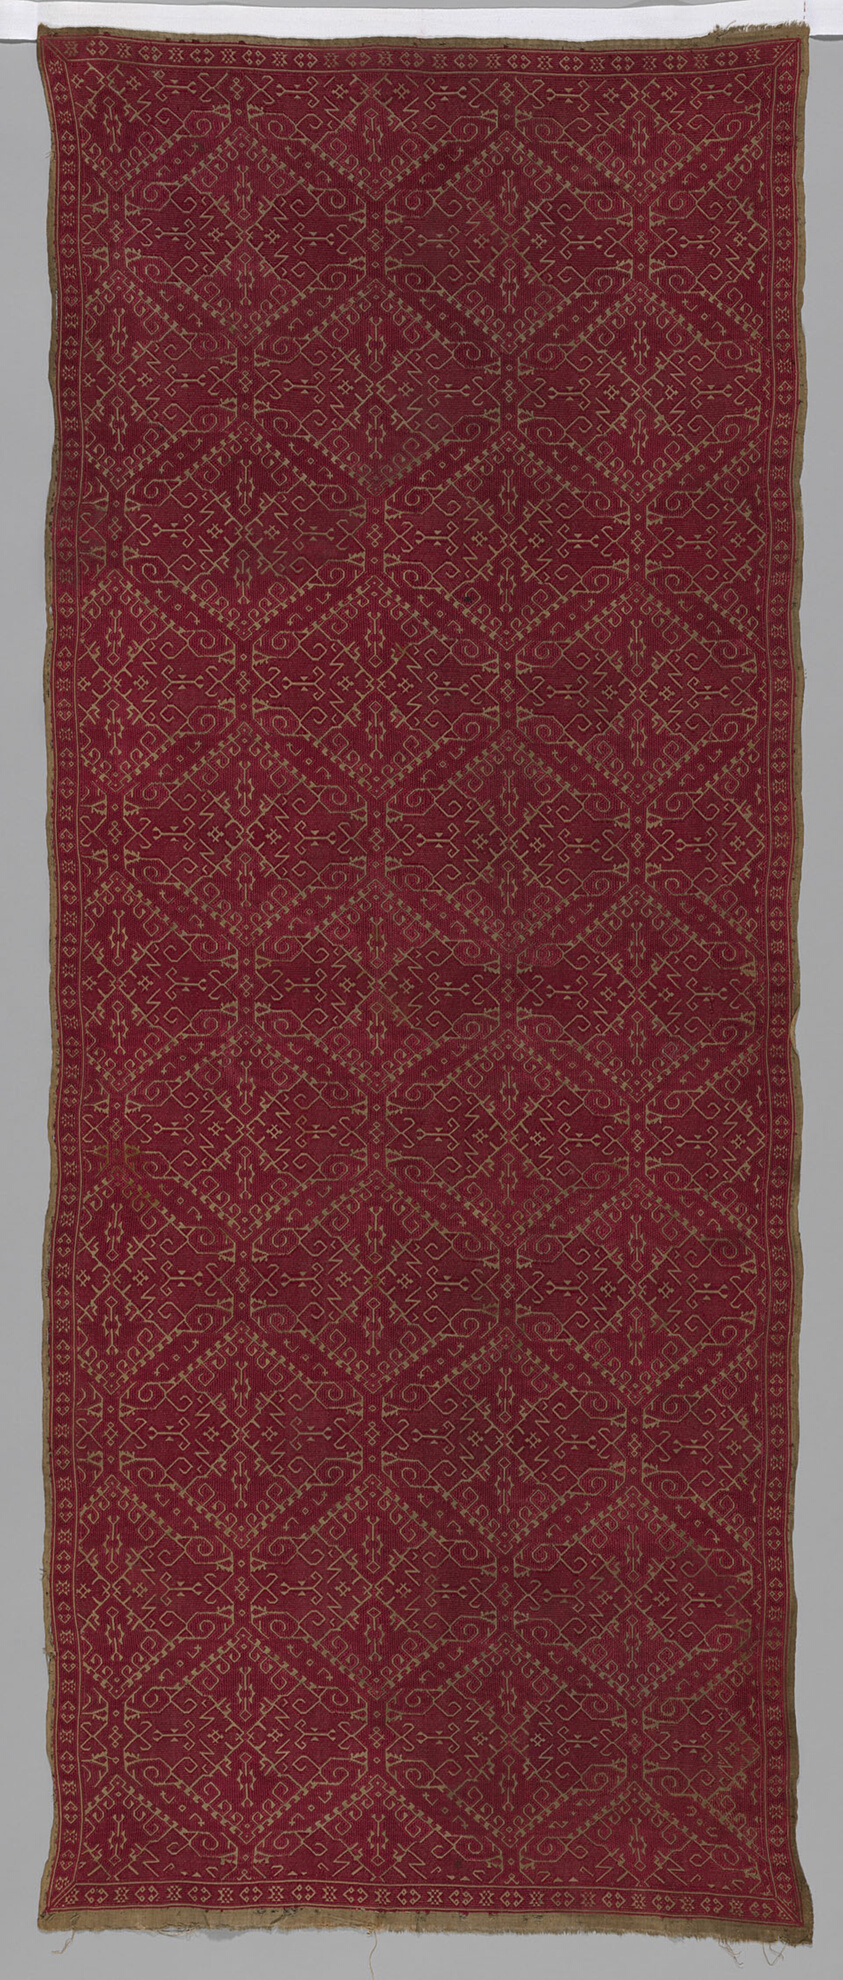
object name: Textile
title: Panel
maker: Greece, Cyclades Islands, Naxos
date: 18th century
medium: Linen, plain weave; embroidered with silk in running stitches (pattern darning); two selvalges present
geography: Náxos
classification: textile; needlework (visual works)